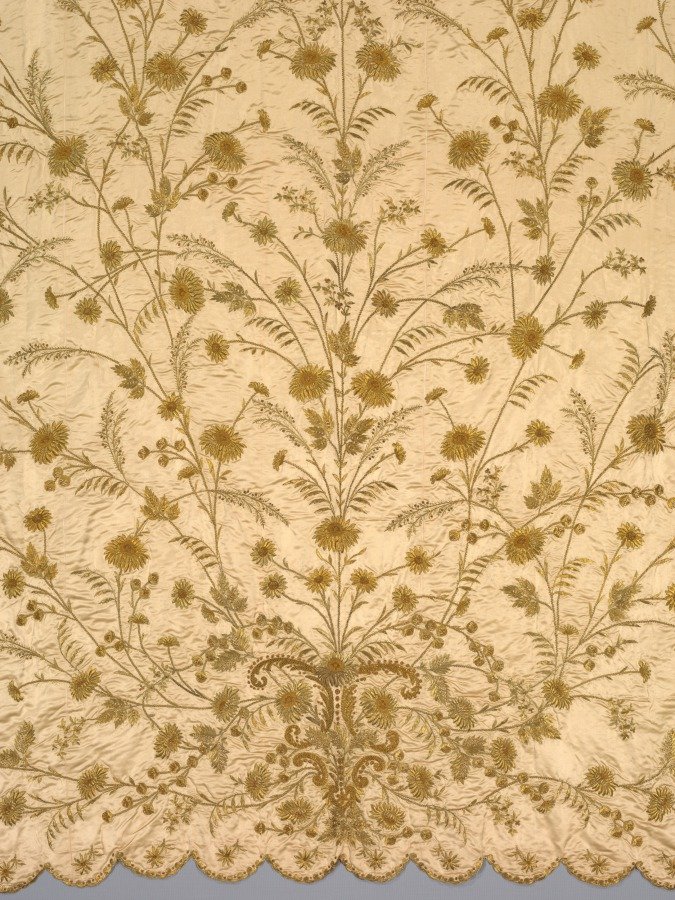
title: Canopy (?)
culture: France, 19th century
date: 1800s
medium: embroidery, silk and gold thread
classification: Embroidery